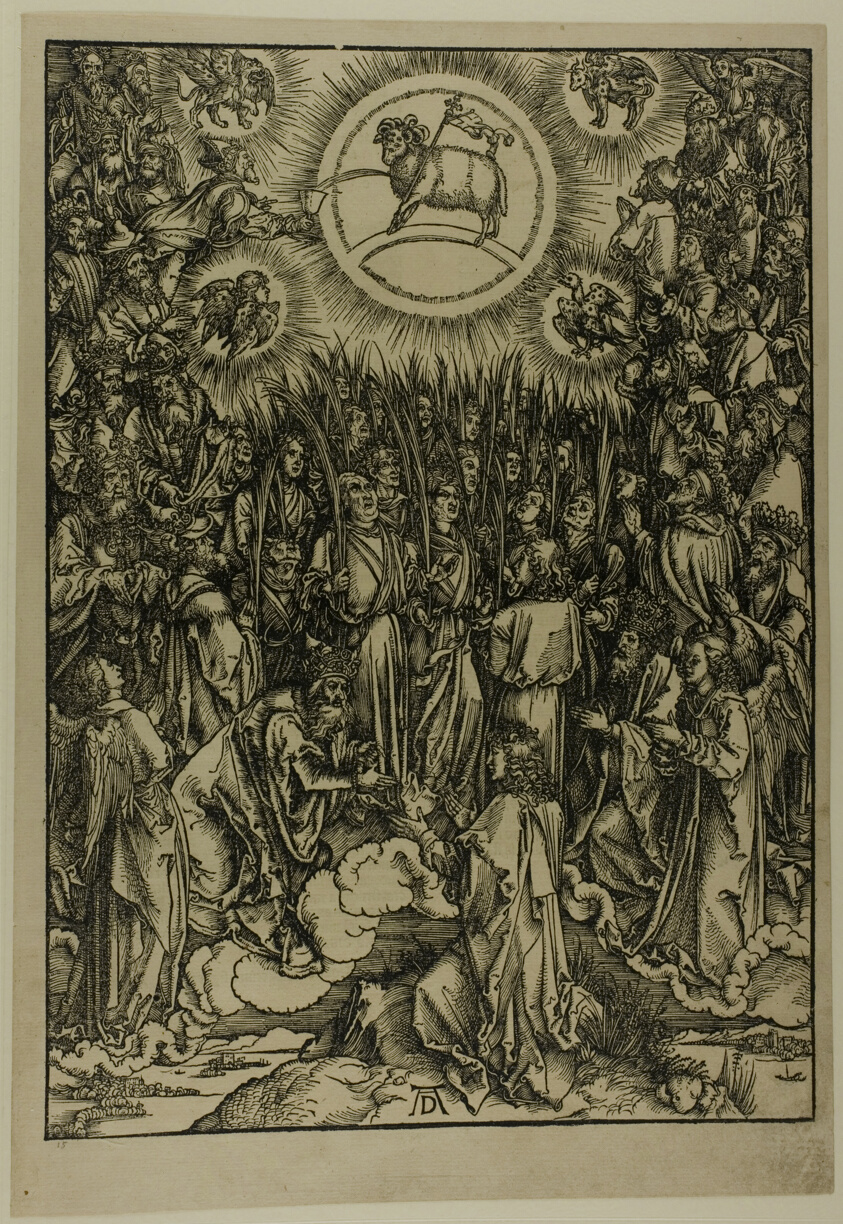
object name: Print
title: The Adoration of the Lamb - The Hymn of the Chosen, from The Apocalypse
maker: Albrecht Dürer (German, 1471-1528)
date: c. 1496–98, published 1511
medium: Woodcut in black on tan laid paper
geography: Germany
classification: woodcut; print; prints and drawing; paper